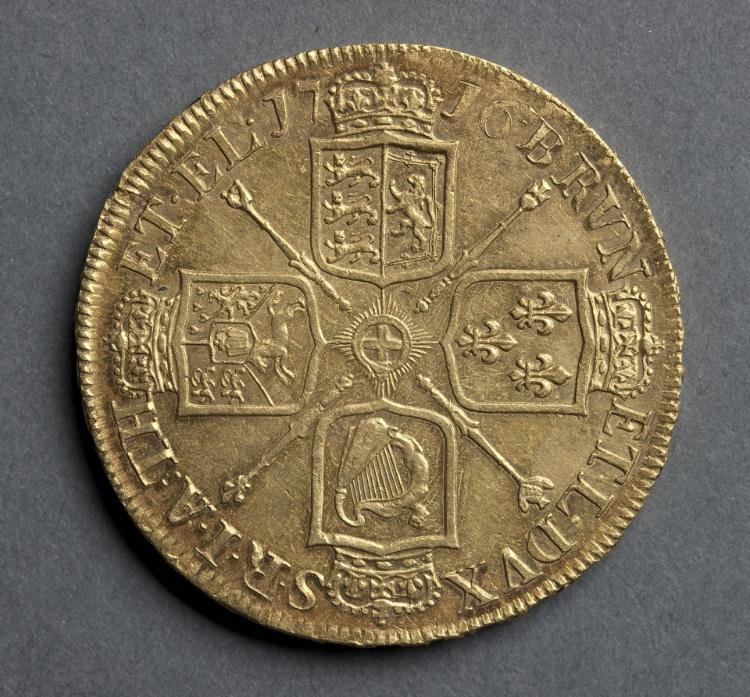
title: Five Guineas: Shields and Star of the Order of the Garter (reverse)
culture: England, George I, 1714-1727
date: 1716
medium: gold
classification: Coins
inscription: BRVN.ET.L.DVX.S.R.I.A.TH.ET.EL.1716.